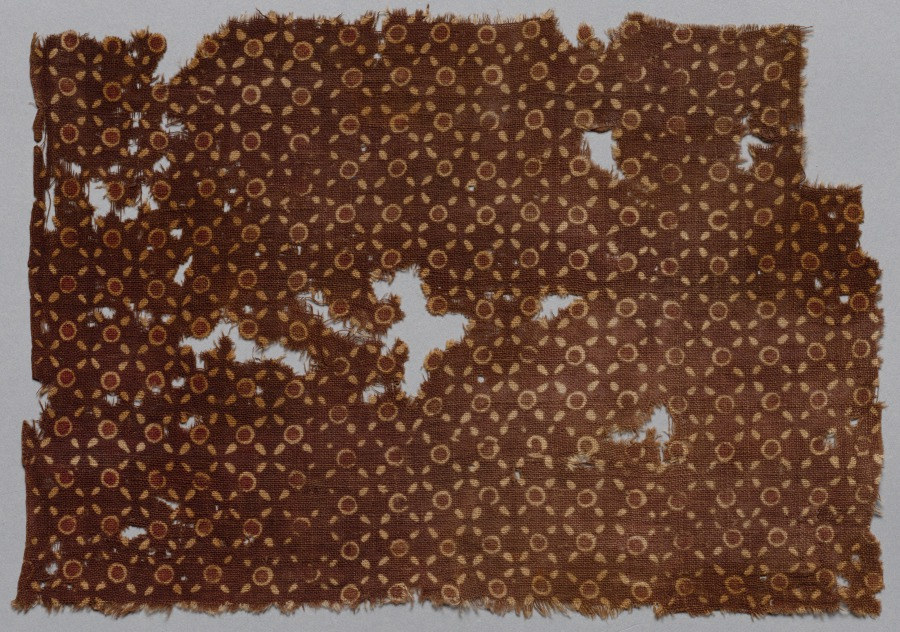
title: Fragment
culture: India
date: 1100s–1300s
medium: Cotton: plain cloth, resist dyed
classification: Textile